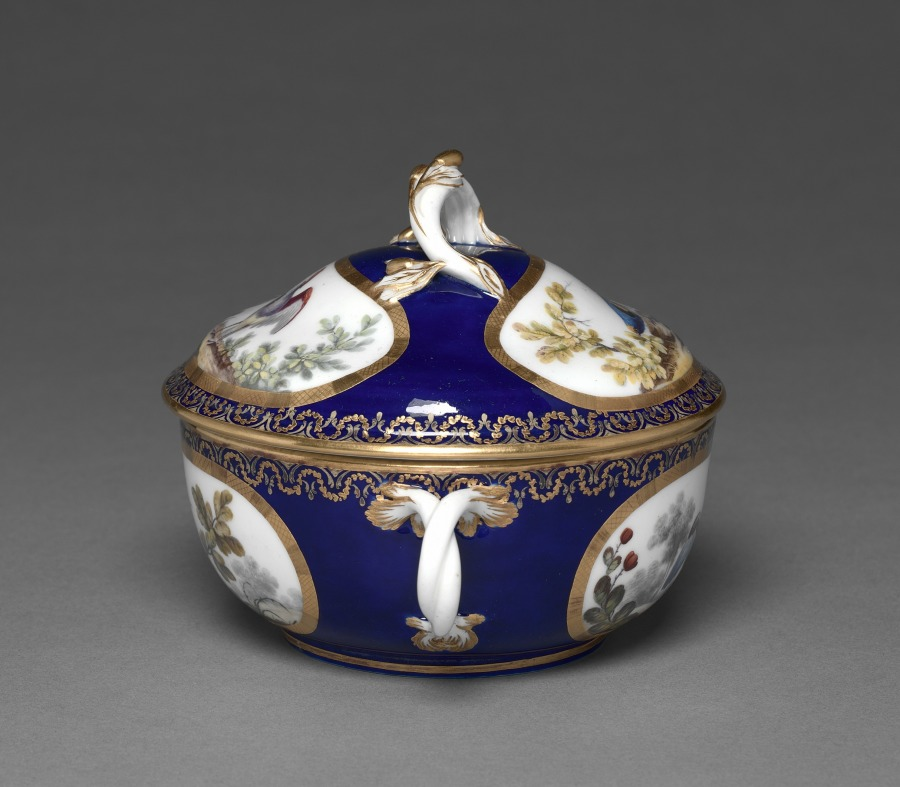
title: Covered Broth Bowl and Stand (Écuelle ronde et plateau ovale)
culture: France, Sèvres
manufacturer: Sèvres Porcelain Factory (French, est. 1756)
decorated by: François-Joseph Aloncle (French)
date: 1772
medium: soft-paste porcelain with enamel and gilt decoration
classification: Ceramic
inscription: Interlaced Ls with date letter 'T'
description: Birds were collected in all forms during the 18th century following an increased European interest in natural history. The birds on this bowl and stand were painted by François-Joseph Aloncle, one of the Sèvres porcelain factory’s principal bird painters. Small, two handled bowls like this one would hold broths or soups consumed by an individual during the toilette, a ritual of washing and dressing practiced by the 18th-century French elite.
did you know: Two different colors of gold decorate these objects’ borders, exemplifying more complex forms of gilding introduced in the 1770s.